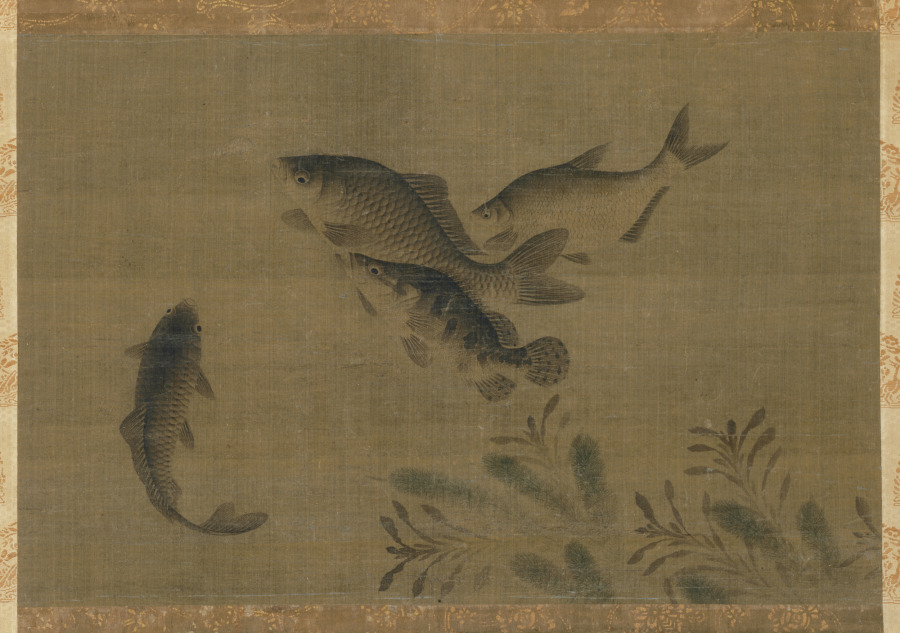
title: Fish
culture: China, Ming dynasty (1368–1644)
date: c. 1400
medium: hanging scroll, ink and slight color on silk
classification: Painting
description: Four fish of various sizes are swimming among aquatic plants. Like in other paintings, the existence of water is suggested in the harmonious movement of the fish and plants. In Chinese, the word for fish (yu) is a homophone for “abundance” and thus the motif has an auspicious connotation. The painter uses the so-called boneless technique without outlines to shade and texture the bodies of the fish. The smooth transition from dark shades on their backs to their white bellies and the thin transparent fins and tails in light washes accentuated by gills and scales are all executed without contour lines.